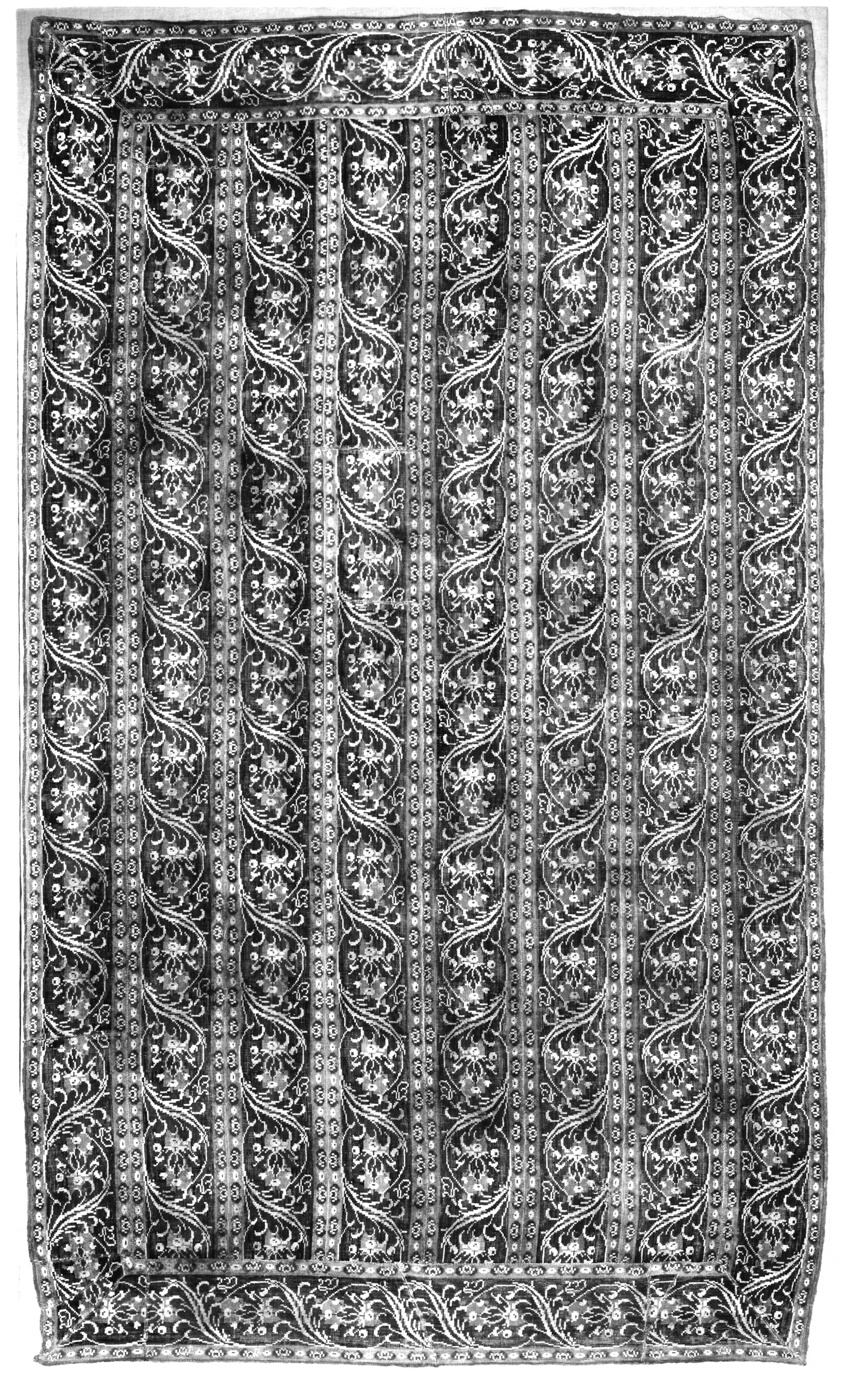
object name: Textile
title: Carpet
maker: Spain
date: 18th century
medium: Wool and linen, plain weave with supplementary warps forming cut pile; ten strips joined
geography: Spain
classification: textile; weaving - carpet; rug